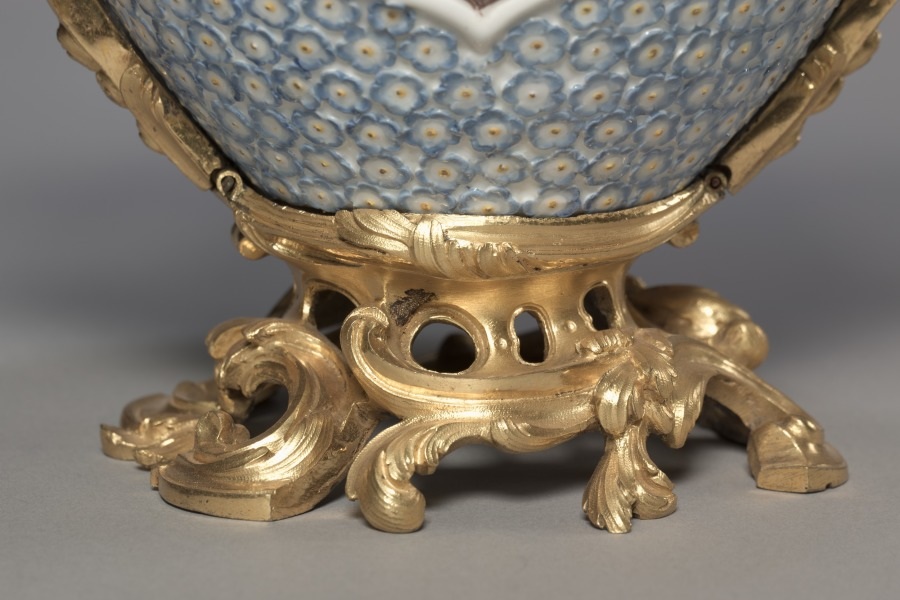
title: Vase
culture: Germany, Meissen, 18th century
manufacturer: Meissen Porcelain Factory (German, est. c. 1710)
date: 1749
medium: porcelain mounted in gilt bronze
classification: Ceramic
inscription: on obelisk located in one of the cartouche openings, the date 1749 appears.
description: One of these vases is dated 1749. They were perhaps part of a set of four covered vases that we know from documents were acquired by Mme. de Pompadour, mistress of Louis XV in 1752.